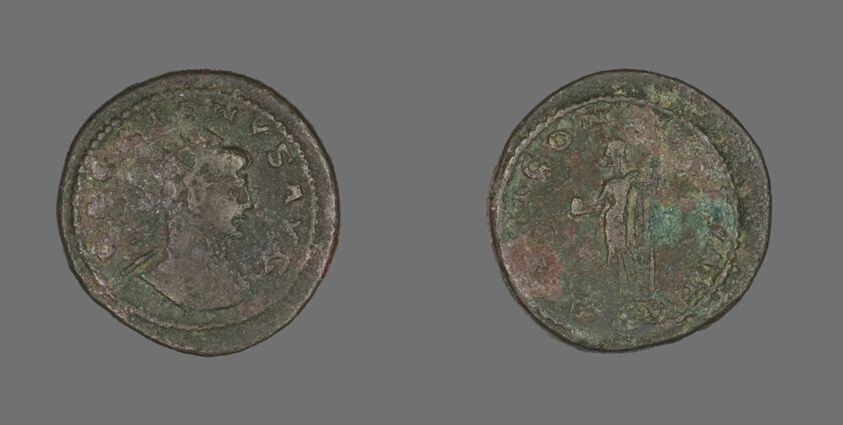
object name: Coin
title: Antoninianus (Coin) Portraying Emperor Gallienus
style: roman (ancient, style or period), ancient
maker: Roman, minted in Asia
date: 260-268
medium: Silver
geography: Roman Empire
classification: coin; ancient art